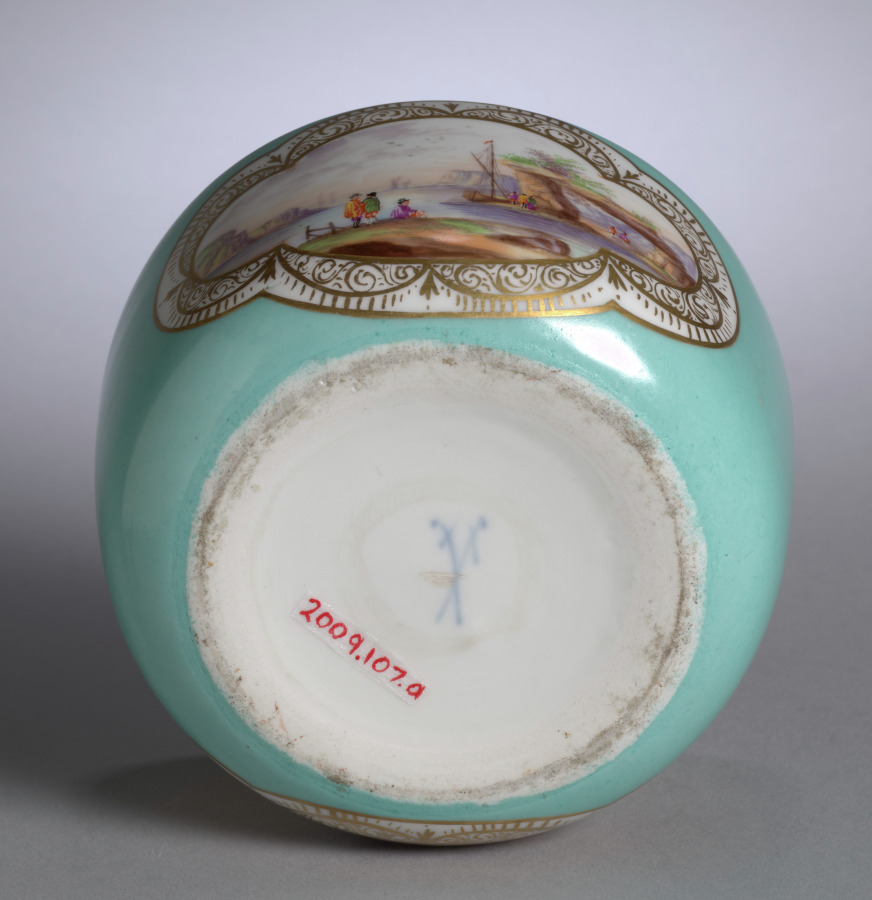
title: Bowl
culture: Germany, Meissen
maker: Meissen Porcelain Factory (German, est. c. 1710)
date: c. 1750–70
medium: porcelain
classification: Ceramic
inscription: Half moon mark on the bottom.